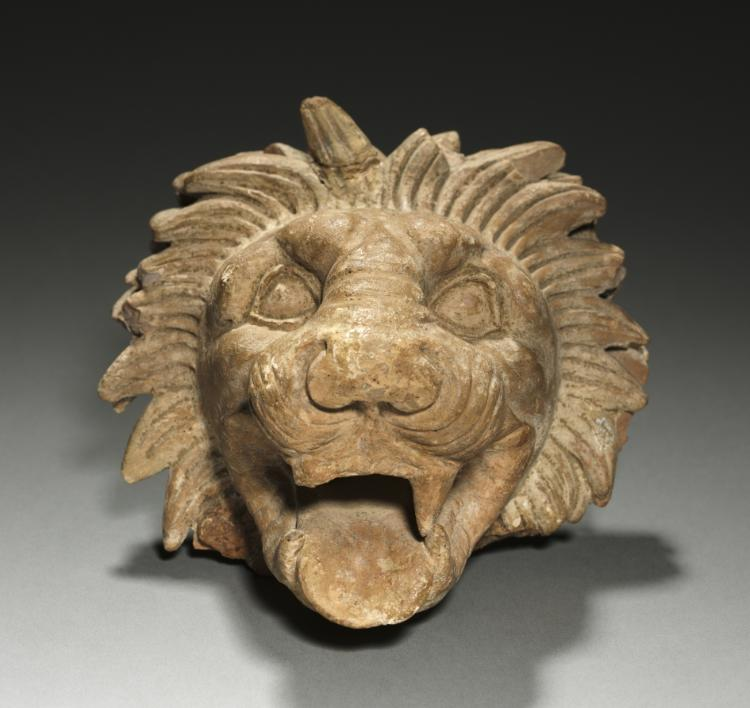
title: Lion's Head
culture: Greece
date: 500–400 BCE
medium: terracotta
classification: Sculpture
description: This terracotta sculpture is molded in the shape of a lion’s head. The lion opens its mouth and lolls out its tongue, showing off large upper and lower incisors (broken on one side). A mane spreads out around the lion’s head, framing the face. Lion heads like this one often served as architectural decoration.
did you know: Lions once roamed the lands around ancient Greece but were probably extinct in the region by the 2nd century BCE.